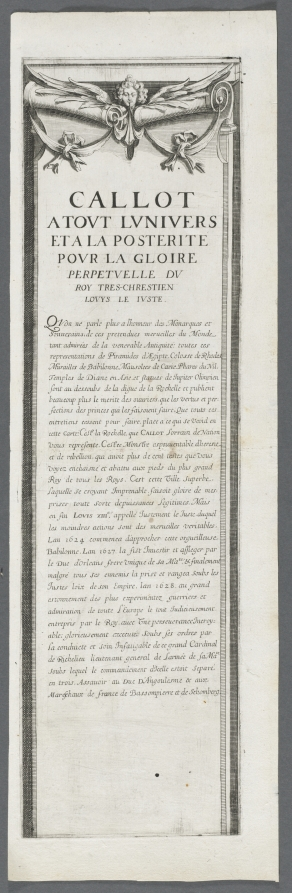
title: The Siege of La Rochelle: Plate 4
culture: France, 17th century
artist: Jacques Callot (French, 1592–1635)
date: 1628–1630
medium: engraving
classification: Print